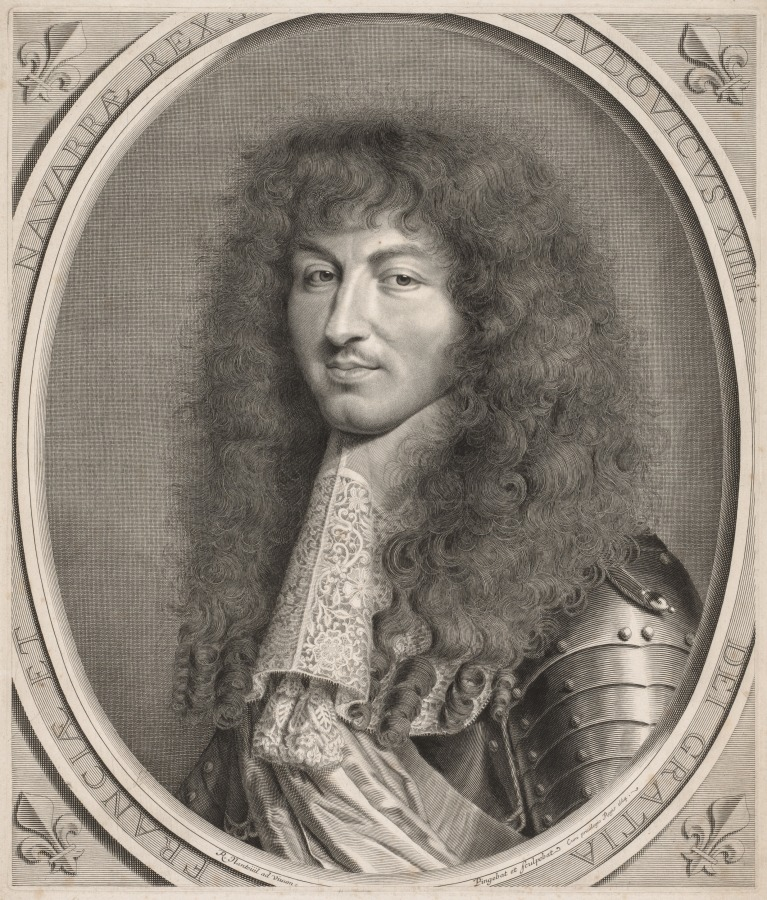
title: Louis XIV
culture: France, 17th century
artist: Robert Nanteuil (French, 1623–1678)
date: 1664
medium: engraving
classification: Print